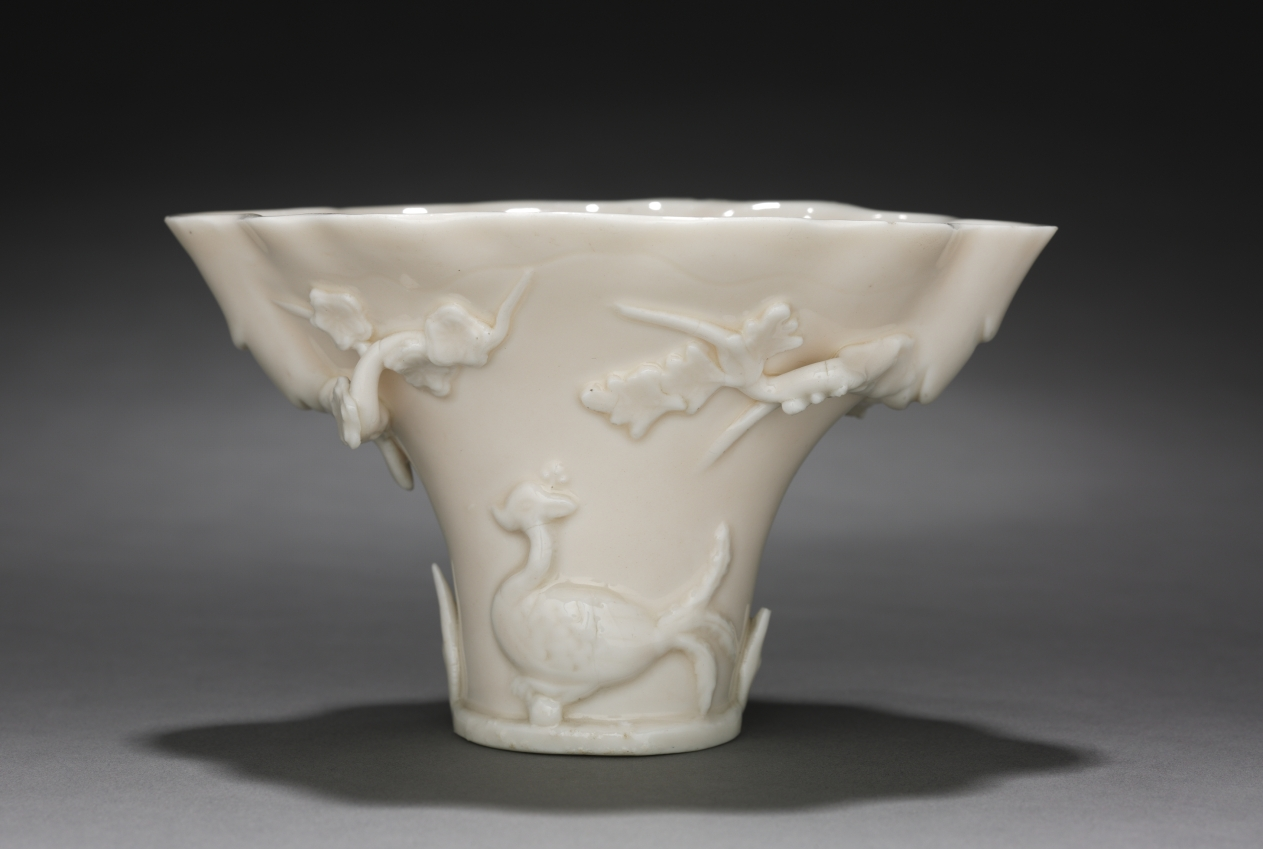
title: Libation Cup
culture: China, Qing dynasty (1644-1911), Kangxi reign (1661-1722)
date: 1662–1722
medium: porcelain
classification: Ceramic